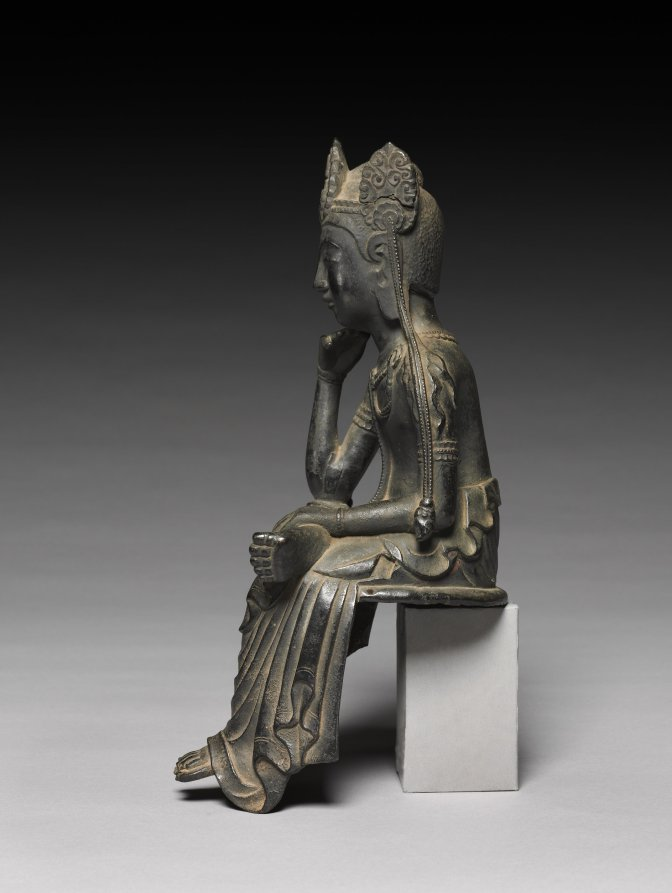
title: Buddha of the Future (Miroku Bosatsu)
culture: Japan, Asuka period (538–710)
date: late 600s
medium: cast bronze, incised, with traces of gilding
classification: Sculpture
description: Buddhism was introduced to Japan in the sixth century. For early Japanese devotees, Buddhism offered the promise of salvation through faith in the Buddha of the Future, who would appear at the end of the world. The concept of eternal salvation held particular resonance with the Japanese aristocracy, who became the staunchest supporters of this new faith. Small sculptures like this one, with its gentle grace and powerful presence, were popular devotional objects.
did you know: The Sanskrit name of this being, Maitreya, derives from the Sanskrit word for friend, mita.